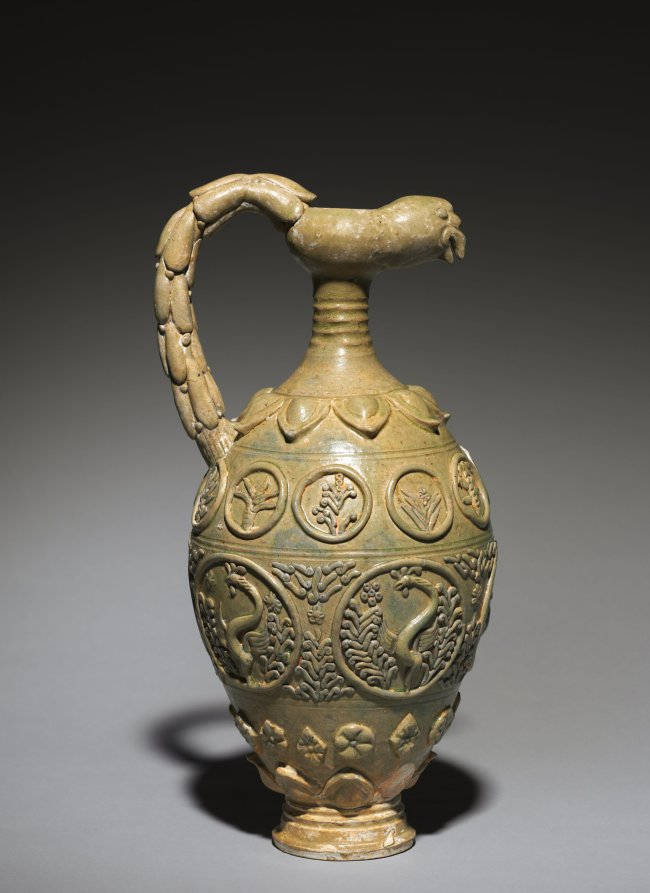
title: Bird-Headed Ewer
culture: China, probably Henan province, Tang dynasty (618-907)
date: 600s–700s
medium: green-glazed stoneware with modeled, molded, and applied decoration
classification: Ceramic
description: With a lobed body, a bird-shaped head, and a birdfeather loop handle, this ewer is derived from West and Central Asian metalwork: Tang potters adopted foreign shapes (bird-headed ewer and amphora) and foreign motifs (floral medallions, vines, palmette, and roundel designs) with great freedom. The artistic expressions bespoke the confidence and spirit of the period. This work is a representation of northern celadon, although it is commonly believed that the northern kilns specialized in white wares and the southern kilns in green wares (notably, Yue celadon). It continues the tradition of celadon production in the north during the late Northern Dynasties period in the 500s.